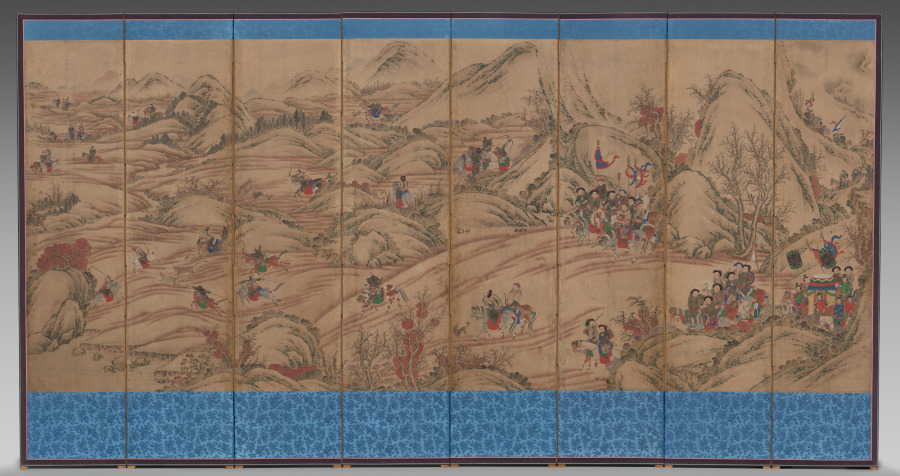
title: Hunting Scene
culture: Korea, Joseon dynasty (1392–1910)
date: 1800s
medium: eight-panel folding screen; ink and color on silk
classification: Painting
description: The theme of nomad warriors riding horses and hunting wild animals was first painted in the Qing imperial court in China in late 1600s. But it became favored by the Korean royal court and painted by the royal court painter in the late 1700s. The Joseon Korean ruling class members considered Qing nomad warriors to be "barbaric," yet highly admired their hunting and military skills. By the late 1800s, folding screens with the hunting scene were used largely for this dynamic and exotic feature.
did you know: The theme of nomad warriors hunting became highly appreciated in the Korean royal court of the 1700s for the king's particular interests in strengthening the royal army's military prowess.